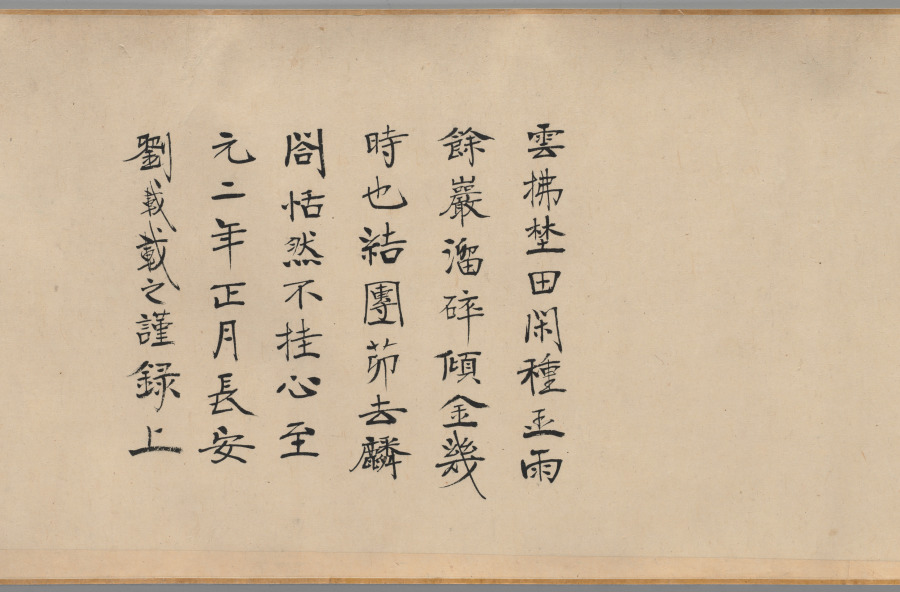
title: Streams and Mountains without End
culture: China, late Northern Song dynasty (960-1127) - Jin dynasty (1115-1234)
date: 1100–1150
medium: handscroll; ink and slight color on silk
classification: Painting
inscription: 9 colophons and 48 seals: 1 colophon, dated 1205, of Wang Wenwei 王文蔚 (dates unknown); 1 colophon, dated 1205, of Li Hui 李惠 (dates unknown); 1 colophon of Weiluo Tian Xie 蔚羅田獬 (dates unknown); 1 colophon, dated 1214, of He Yan 何言 (dates unknown); 1 colophon, dated 1326, of Cao Yuanyong 曹元用 (d. 1329) 1 colophon, dated 1332, of Kangli Zishan 康里子山 (Naonao; 1295-1345); 1 colophon, dated 1336, of Liu Zai 劉載. (dates unknown); 1 colophon, dated 1380, and 4 seals of Yang Mao 楊懋 (1300-after 1380); 4 seals of the Hou family (ca. 1340); 1 colophon of Wang Duo 王鐸 (1592-1652); 4 seals of Zhang Bingqian 張秉乾 (juren of 1729); 8 seals of Liang Qingbiao 梁清標 (1620-1691); 2 seals of the Qianlong emperor (r. 1736-95); 4 seals of the Jiaqing emperor (r. 1796-1820); 3 seals of the Xuantong emperor (r. 1909-11); 2 seals of Ye Gongchuo 葉恭綽 (1881-1968); 17 seals of Zhang Yuan 張爰 (Zhang Daqian 張大千, 1899-1983).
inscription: Colophon 1. Wang Wenwei 王文蔚. Dated third month and third day, 1205, under the reign of Zhangzong of the Jin dynasty. 造物元無心，山川秀氣聚。畫手亦無盡，各出新意度。 誰將妙林泉，淡墨寫縑素。重巒疊嶂間，三兩人家住。 茅舍隔素籬，小橋通細路。溪上數葉舟，雅有物外趣。 嵓崦藏招提，依稀認窗戶。山色四時宜，雲煙自朝暮。 不知塵世中，此景在何處。收拾買山錢，投老好歸去。 泰和乙丑三月三日平原王文蔚謹再拜，書于河東縣署之野趣堂。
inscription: Colophon 2. Li Hui 李惠. The colophon was written three days before the Qingming Festival in 1205. 畫師慣在山中居，含毫吮墨聊自娛。 閑將一段冰霜絹，寫出千里江山圖。 前山後山互出沒，山腰林樾相縈紆。 危橋澗溜瀉鳴玉，山根一匯為平湖。 波平短艇快漁釣，雲深細徑來樵蘇。 僊宮梵宇占幽勝，雕欄複閣森蓬壺。 往來行客煙靄外，飄飄野店青帘孤。 人家雞犬聲相接，熙熙化日安唐宇。 嗟余嗜好何其迂，膏肓泉石真吾徒。 一行作吏墮世網，薄書汨沒勞奔趨。 千巖萬壑但夢想，故園三徑應將蕪。 披圖暫洗黃塵眼，拊膺三嘆空踟躕。 泰和乙丑清明前三日絳臺李惠書于舜城府署之九思堂。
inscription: Colophon 3. Weiluo Tian Xie 蔚羅田獬. 畫工紛紛不可紀，擺脫俗流幾人耳。 夫誰援筆掃鵝溪，一段風煙且千里。 白波青嶂渺無窮，水接山兮山插水。 小橋野店相勾連，古寺樓臺突兀起。 飄然氣象與神俱，但患未明孰姓氏。 郭熙雖老典型存，為問主公無乃是。 此畫世希當寶藏，無與碌碌同一視。 更看卷首數公詩，奇絕清新相表裏。 蔚羅田獬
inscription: Colophon 4. He Yan 何言. Written in 1214. 萬有來自無，一真歸所託。畫師得三昧，胸中幻丘壑。 百態逐墨破，群形隨筆落。地近迹分明，天遙痕隱約。 雲物自吐吞，峯巒非斧鑿。江鄉閴無市，谷關常不鑰。 中有野夫閑，童琴而歩鶴。酒斾出籬懸，漁舟臨岸泊。 澗樹蔽橋樑，巖松迷殿閣。岑疊宿霧重，野曠林煙薄。 危棧接縈紆，亂泉通脈絡。途中人往來，僕馬何羸弱。 怪石虎踡跼，古木龍蟠錯。一幅宜好收，千金非易博。 玉堂閑卷舒，眼界增寥廓。視險尚寛平，見危除慘虐。 氣象溢國華，川澤資廟略。功名業已書，歸去鞭先著。 但知色即空，何是今非昨。飽乎仁智心，箇中無限樂。 貞祐甲戌秋暮，東營何言題。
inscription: Colophon 5. Cao Yuanyong 曹元用 (d. 1329). Dated 1326. 岸擁危橋斷，溪浮小艇斜。 萬山最深處，依約兩三家。 泰定丙寅秋，曹元用題。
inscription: Colophon 6. Kangli Zishan 康里子山 (i.e., Kangli Naonao). The colophon bears a date of 1332. 右溪山圖，意韻蕭灑。一見使人有烟霞之想，真可珍藏。又有□金諸名勝題詩其左。兵火之餘， 殊不易得也。 至順三年暮春之月，康里子山跋。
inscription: Colophon 7. Liu Zai 劉載. 雲拂埜田閑種玉，雨餘巖溜碎傾金。 幾時也結團茆去，麟閤恬然不挂心。 至元二年正月，長安劉載載之謹錄上。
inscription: Colophon 8. Yang Mao 楊懋 (1300–after 1380). 觀此圖，經營位置，筆法高古，山明石潤。其橋梁、路道、樹林、人物、遠近；一一誠得真山水之深趣。非當時名筆有大才者不能至此。不必問其誰何，可為神品。况宋金元三朝名公所跋，尚不能記，想其來尤遠矣。然而物經累變而尚存，是物之有壽者也。余不復再論。文顯其保之。洪武庚申春，八十翁楊懋觀。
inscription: Colophon 9. Wang Duo 王鐸 (1592–1652). 文蓀親翁博雅，文詩鴻暢。舍弟持此喜觀，遂抽管題數語： 山勢委折，筆墨無痕。宋人中如此不多見也。譬之兵家，當是韓白。王鐸。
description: Streams and Mountains without End was a landmark acquisition of 1953, made just a year after Sherman Lee had returned to Cleveland as curator of Oriental art. He acquired it with the intention to provide "a more than adequate foundation for a fine collection of Chinese landscape painting." This impressive work demonstrates the culmination of stylistic developments in Chinese monumental landscape painting following the Northern Song tradition. It represents a journey through a landscape, making it a fitting metaphor for Lee’s journey of discovery and achievement over a lifetime.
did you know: The portrayal of the distant lands is rich with details like pavilions, villages, and human activities.